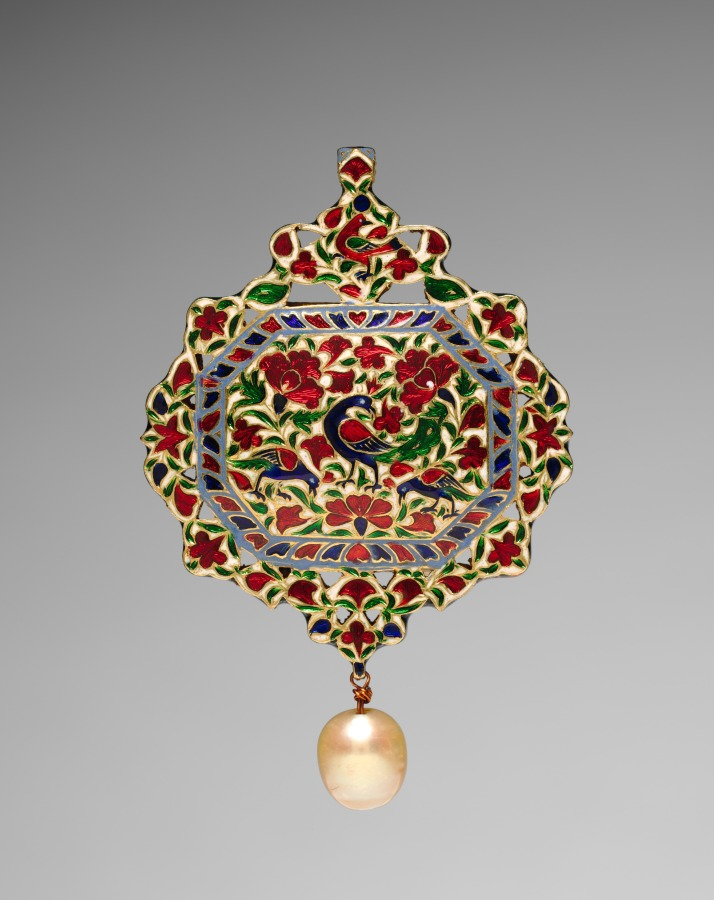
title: Pendant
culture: Northwestern India, Rajasthan, Rajput Kingdom of Jaipur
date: 1700s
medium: Gold, emerald, diamonds, enamel, and pearl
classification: Jewelry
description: The large green emerald on one side of this pendant was probably imported to India from Columbia. Delicately incised with a lotus blossom, a symbol of the sun, it is surrounded by inset diamonds in organic, petal-like shapes. Emeralds, especially prized for their green color, were associated with the planet Mercury in Hindu astrology and with the power to ward off evil in Islam. On the reverse, a peacock and two peahens surrounded by flowers are rendered using blue, green, and red glass.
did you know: The bright color of the emerald indicates it was sourced in South America.